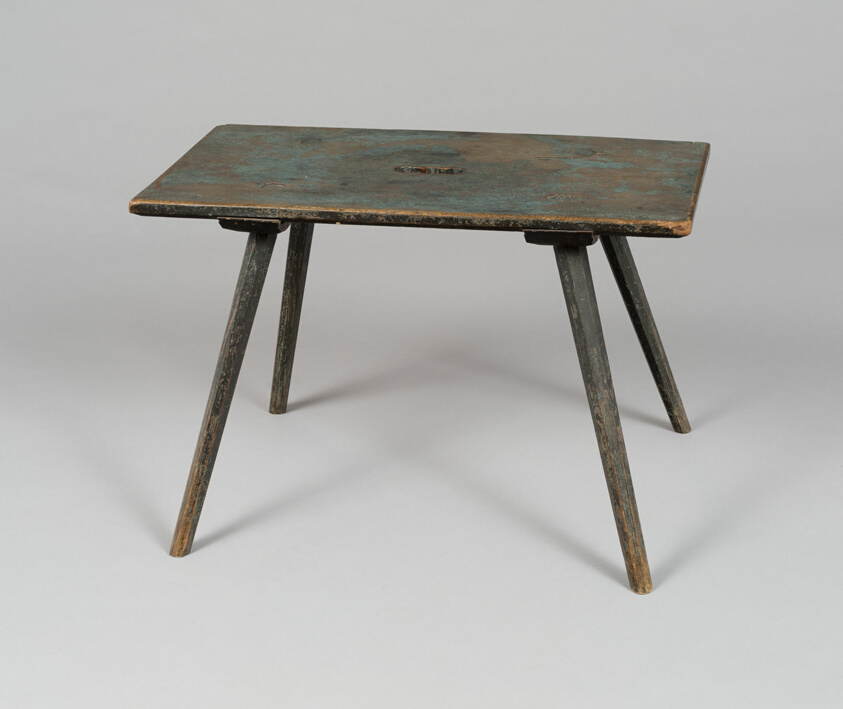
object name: Furniture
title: Stool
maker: Artist unknown (American, 19th century); Zoar, Ohio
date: 1817–37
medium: Walnut and chestnut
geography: Zoar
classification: seating; furniture; american decorative arts; american arts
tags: furniture